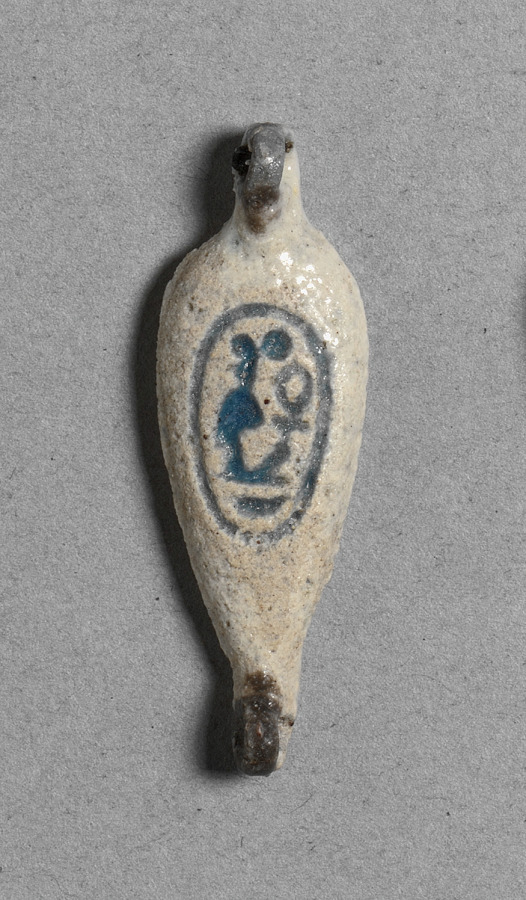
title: Petal-Shaped Bead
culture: Egypt, New Kingdom (1540–1069 BCE), Dynasty 18, reign of Amenhotep III (1390–1352 BCE)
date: c. 1391–1353 BCE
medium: faience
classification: Jewelry